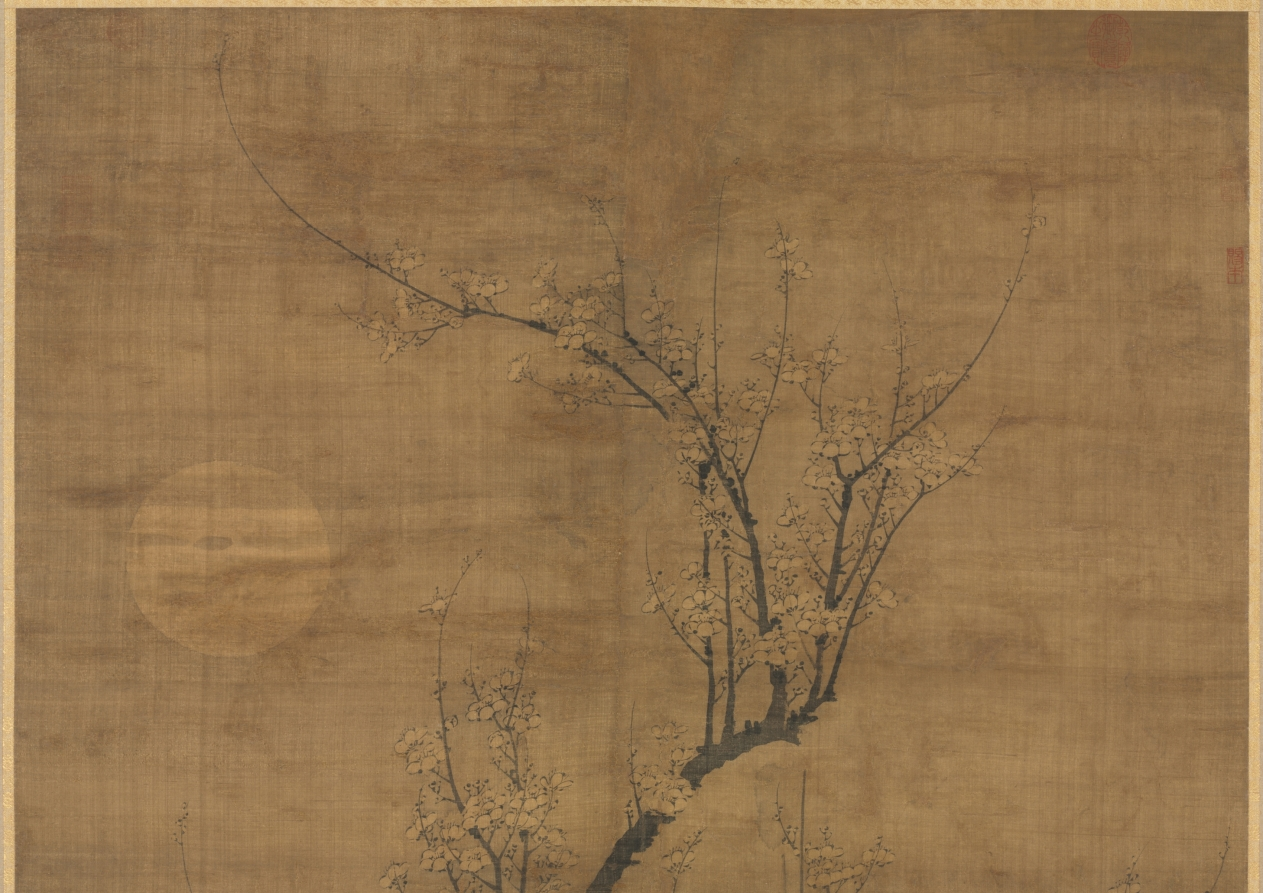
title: A Prunus in the Moonlight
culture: China, Yuan dynasty (1271-1368)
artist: Wang Mian (Chinese, 1287–1359)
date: 1300s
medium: Hanging scroll; ink on silk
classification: Painting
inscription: 8 additional seals: 6 of the Qianlong 乾隆 emperor (r. 1736-95); 2 of Dong Gao 董誥 (1740-1818).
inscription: 海雲初破月團團，獨鶴高飛夜未殘。/ 一片笙簫湖水上，玉妃含笑倚闌干。 王元章作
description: The plum flourishes in the mild climate of the south, and it was not before the Six Dynasties period (220– 589 CE) that the motif began to be appreciated by southern artists, many of whom had emigrated from the north. Wang Mian from Zhejiang province had failed the civil and military service examinations and later rejected appointments under the Mongol government. Instead, he chose to return home, making a living by selling plum paintings. Few of Wang’s works have survived, but they demonstrate that by his time the ink-plum (momei) genre was fully developed.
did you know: The painting portrays the plum in the nighttime, as indicated by the tint of the background and the presence of the moon.